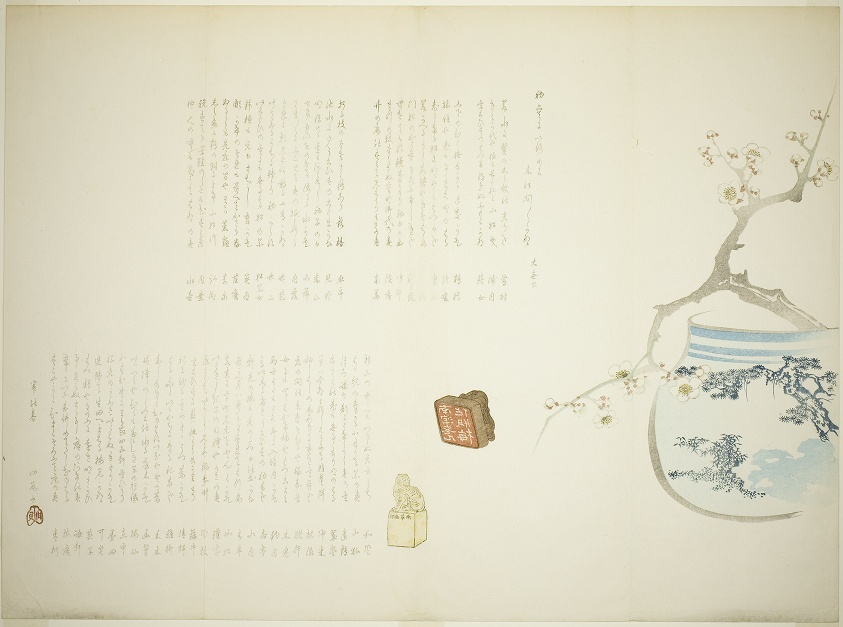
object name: Print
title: A Branch of White Plum Blossoms in a Porcelain Vase, with Two Carved Stone Seals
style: Japanese (culture or style)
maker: Haruki Nanmei (Japanese, 1795-1878)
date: 1866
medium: Color woodblock print; surimono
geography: Japan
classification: print; asian art